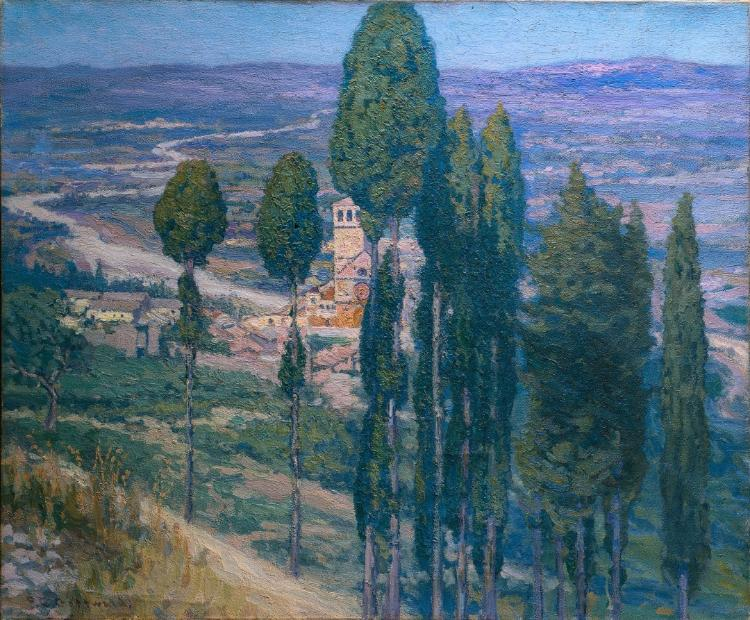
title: The Umbrian Valley, Italy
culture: America, Ohio, Cleveland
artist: Frederick Gottwald (American, born Austria, 1860–1941)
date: 1914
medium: oil on canvas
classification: Painting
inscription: signed lower left: F. C. Gottwald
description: Munich-trained Frederick Gottwald taught for more than four decades at the Cleveland School (now Institute) of Art, and was the most influential figure in the city’s burgeoning artistic development. During the years leading up to World War I, he spent summers in Italy, where he created this work.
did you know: This was the first painting by a living artist acquired by the Cleveland Museum of Art.